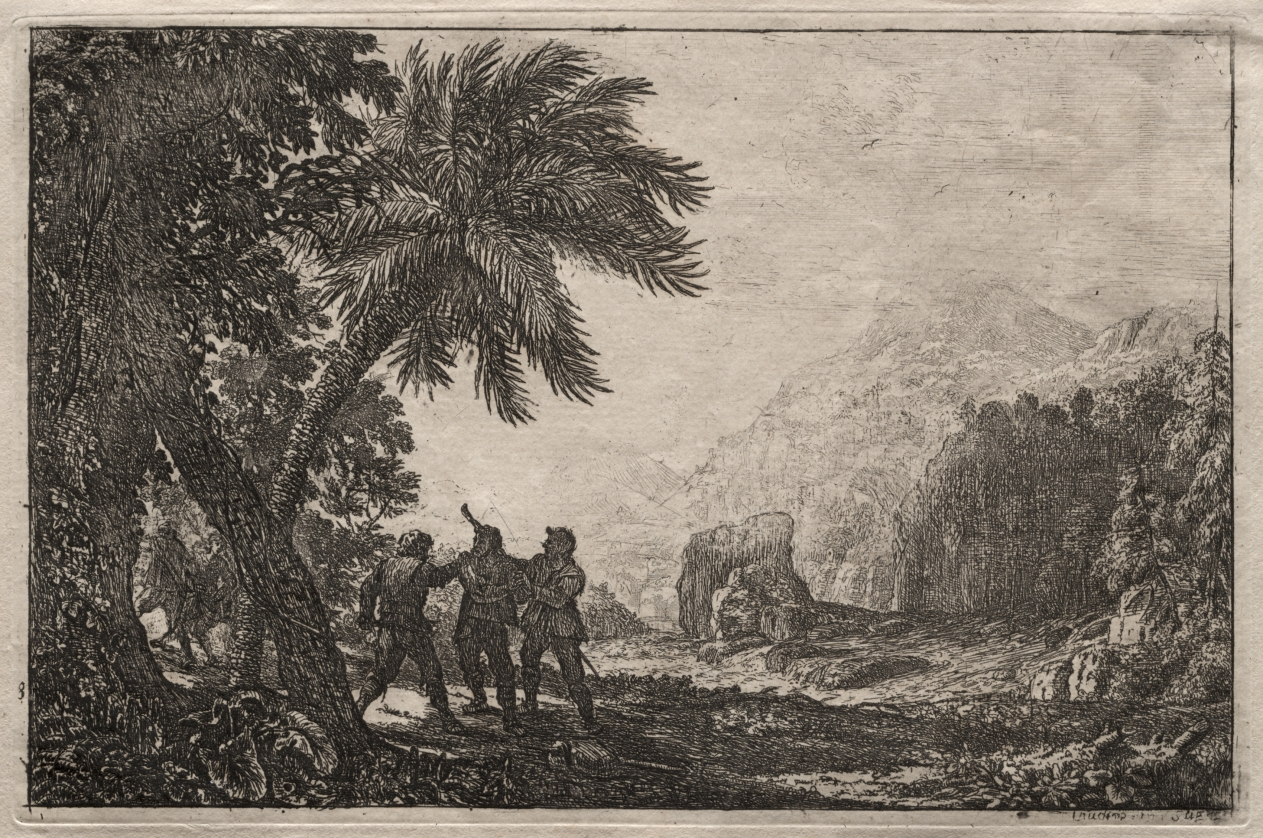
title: Landscape with Brigands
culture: France, 17th century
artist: Claude Lorrain (French, 1604–1682)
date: 1633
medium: etching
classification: Print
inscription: in plate, lower left: E. Detaille